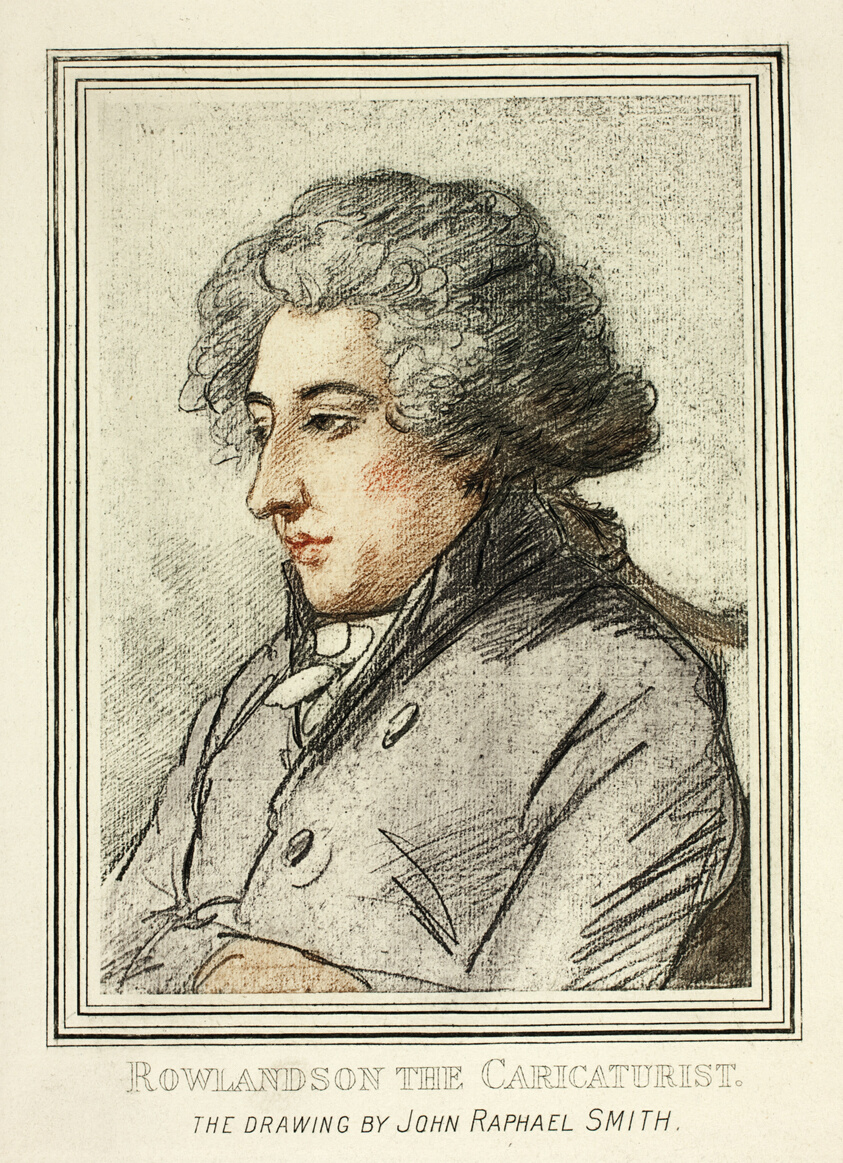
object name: Print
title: Portrait of Thomas Rowlandson, from Reproductions of Drawings by Old Masters in the British Museum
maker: After John Raphael Smith; English, 1751-1812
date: 1894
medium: Color photographic reproduction on ivory wove paper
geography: England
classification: etching; print; prints and drawing